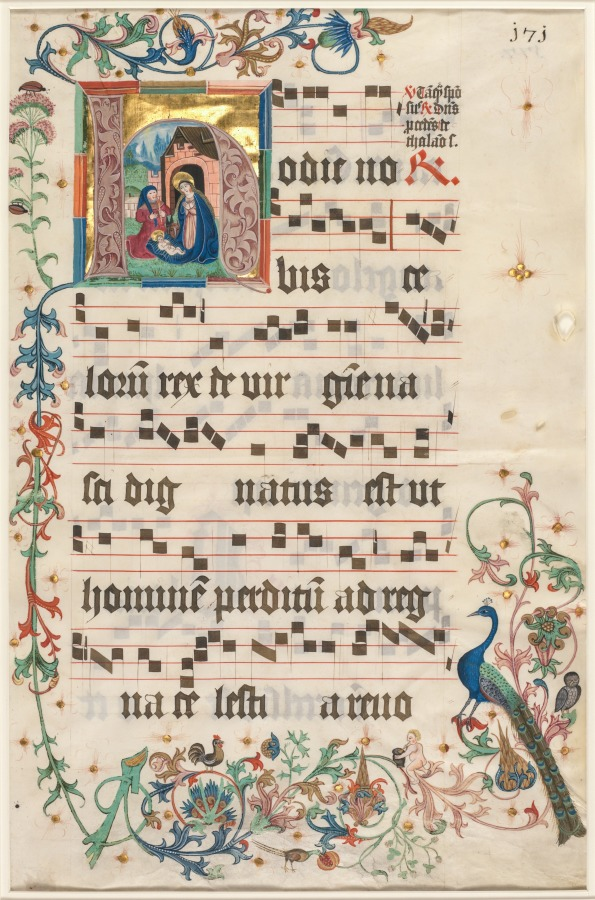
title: Leaf from an Antiphonary: Initial H with the Nativity (recto) and Text (verso)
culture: South Germany, Augsburg (?), 15th century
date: c. 1480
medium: ink, tempera and gold on vellum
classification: Manuscript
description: The border ornament and initial design of this leaf have stylistic affinities with South German illumination of the late 1400s and particularly with the Augsburg workshops. It survives along with two known sister leaves with textual and illustrative references to Saint Clare. This saint was widely venerated during the Middle Ages and is closely associated with Saint Francis who installed her with a group of nuns in a community at Assisi. Francis prescribed an austere way of life for the nuns who afterward became known as the Poor Clares. Saint Clare died in 1253 and was canonized in 1255. The prominent references to Clare in the parent codex to which this leaf belongs implies that it was made for a religious community of that order, perhaps in Augsburg or elsewhere in South Germany. The text reads: Hodie nobis celorum rex (On this day the king of heaven). This is the first matins response for Christmas Day.